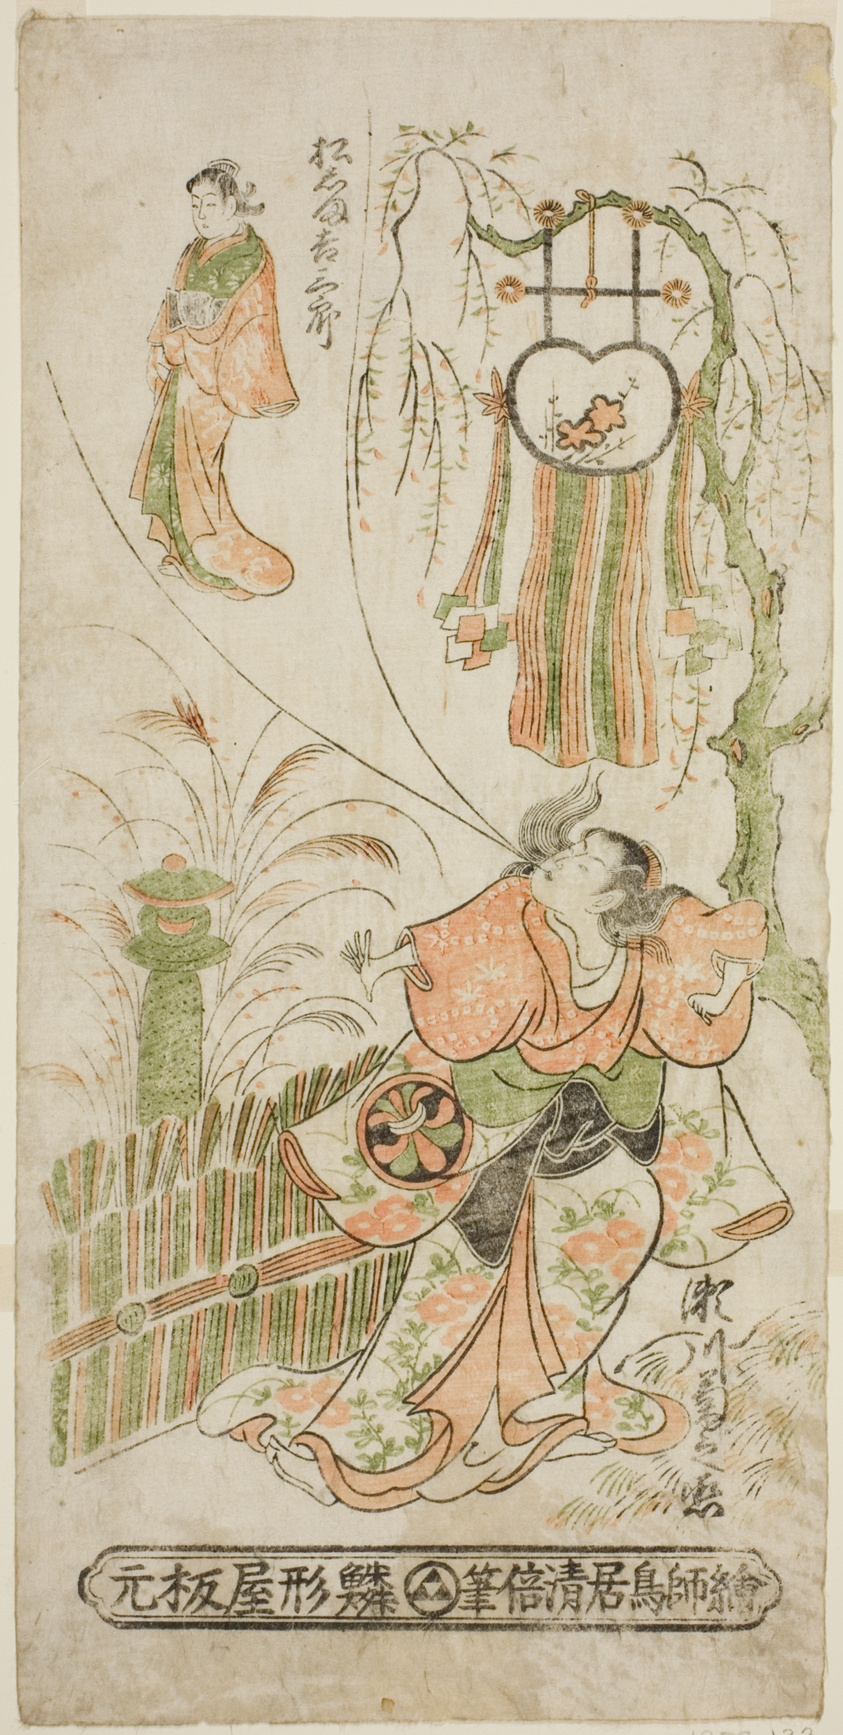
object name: Print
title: The Actors Segawa Kikunojo I as Ochiyo and Matsushima Kichisaburo as Ochiyo's spirit in the play "Higashiyama Gojitsu Yaoya Hanbei," performed at the Nakamura Theater in the eighth month, 1744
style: Japanese (culture or style)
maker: Torii Kiyomasu II (Japanese, 1706 (?)–1763 (?))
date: 1744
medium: Color woodblock print; hosoban, benizuri-e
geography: Japan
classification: woodblock print; print; asian art